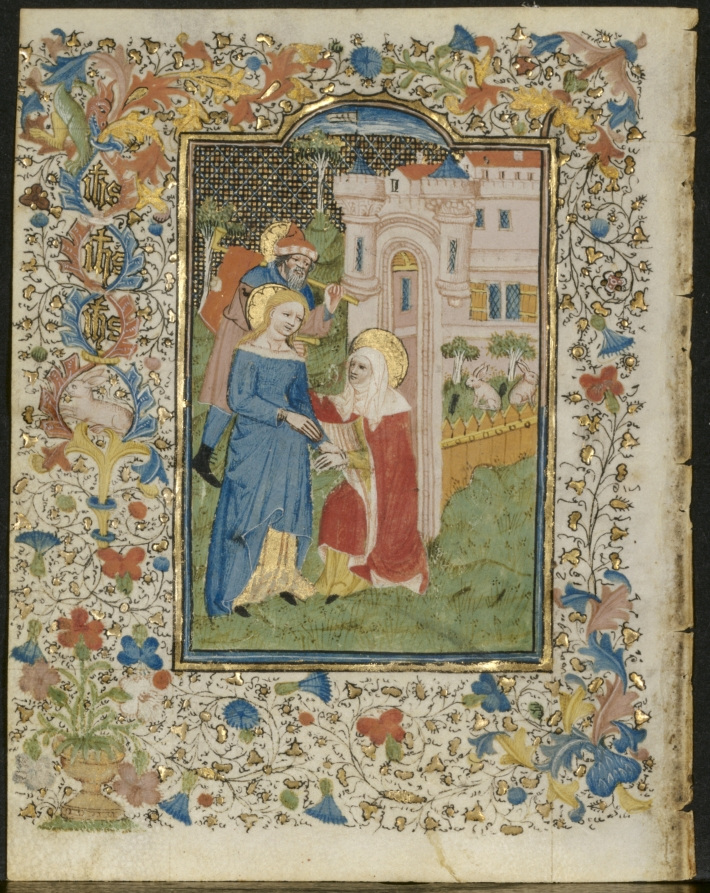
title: The Visitation: Leaf from a Book of Hours (5 of 6 Excised Leaves)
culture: France, 15th century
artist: Henri d'Orquevaulx (French)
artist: or Workshop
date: c. 1420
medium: ink, tempera and gold on vellum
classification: Manuscript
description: This leaf survives from what must have been an extraordinarily rich book of hours. Stylistically, the illuminations relate to the workshop of Henri d'Orquevaulx, a documented Metz manuscript painter. Little is known about d'Orquevaulx's life or career. Compositionally, structurally, and stylistically, the miniatures suggest strong links to Netherlandish illumination.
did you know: Originally used solely by the ordained, by the 1000s, these prayers had spread to the general population through their inclusion in books of hours.